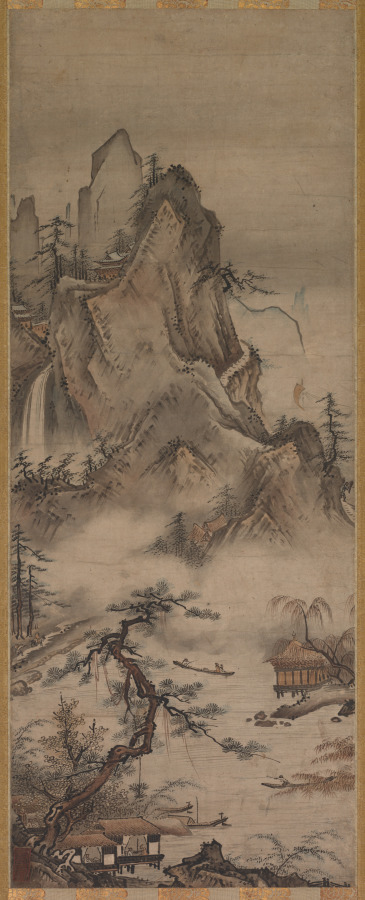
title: Landscape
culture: Japan, Muromachi period (1392–1573)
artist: Judō (Japanese, active 16th century)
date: 1500s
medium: hanging scroll, ink and light color on paper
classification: Painting